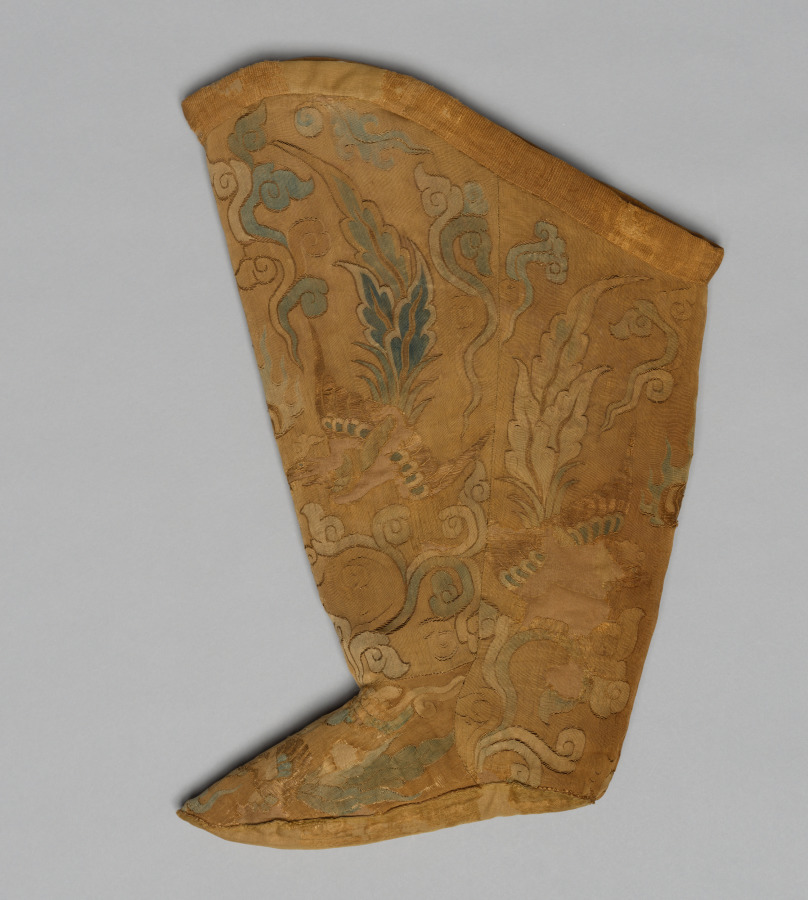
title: Boot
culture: Northern China, Liao dynasty (907-1125)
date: 907–1125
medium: Silk: tapestry weave; two kinds of metal threads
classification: Textile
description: The kesi outer fabric of the boots is woven with pairs of phoenixes chasing a flaming pearl among clouds. The sections were carefully cut so that the flaming pearl occurs at the centers of the shin and calf, and at the top of the instep. To accommodate the particular cut and smaller area of the instep, the phoenixes were depicted slightly differently and the design was reduced in scale. The wide cut of the top of the boots enabled pants to be tucked inside. Skirts, jackets, robes, gloves, and a hat would have completed the outfit. Liao kesi is distinguished by its exceptional refinement. Considered a national specialty, it was used extensively for both clothing and furnishings. Not only were kesi robes worn by the Liao emperor, but they were sent to the Song emperor as imperial gifts.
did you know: The once lavish use of gold and the Chinese-inspired phoenix motif suggest that the boots were made for a member of the Liao imperial family, probably a woman.